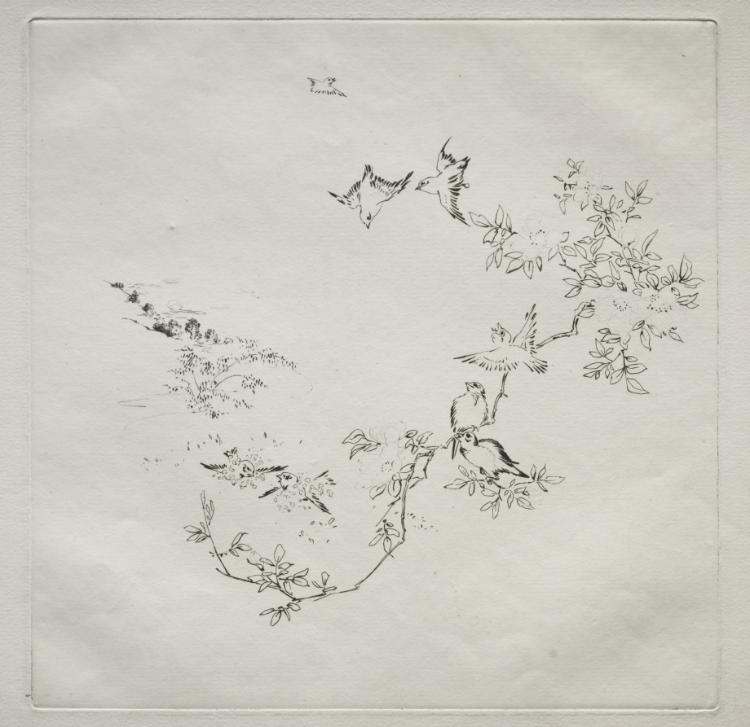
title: Parisian Service (Haviland service): Sunrise (no. 12)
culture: France, 19th century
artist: Félix Bracquemond (French, 1833–1914)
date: 1875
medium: etching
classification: Print